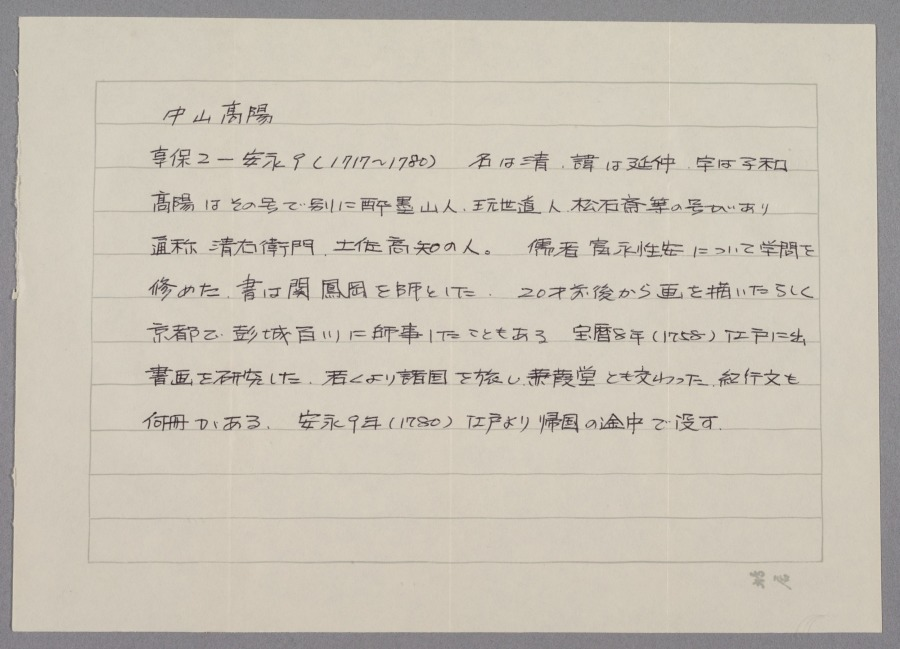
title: Aged Pine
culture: Japan, Edo period (1615–1868)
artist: Nakayama Kōyō (Japanese, 1717–1780)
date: 1717–80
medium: hanging scroll; ink on paper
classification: Painting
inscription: Artist's inscription and seal, lower right.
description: The ancient pine is an admired subject in Asian painting and symbolizes the desirable human qualities of wisdom and solid moral character.